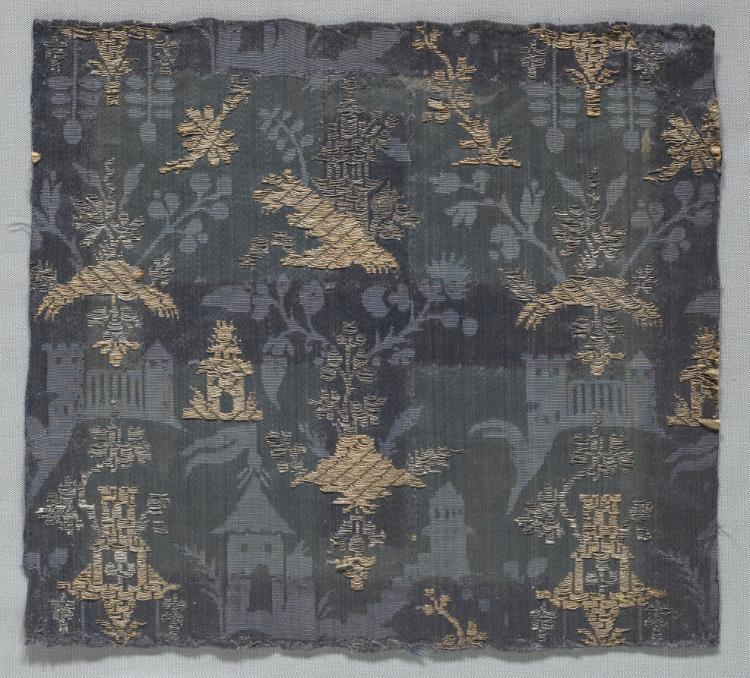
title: Brocaded Damask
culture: Italy or Spain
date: 1700s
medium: silk and metal: damask, brocaded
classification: Textile